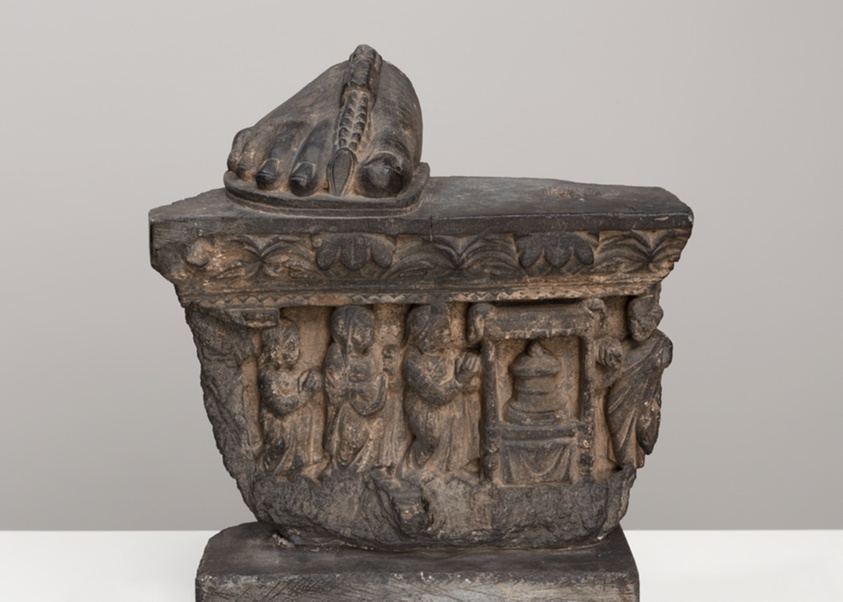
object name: Sculpture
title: Veneration of the Buddha's Relics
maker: Pakistan or Afghanistan; Ancient region of Gandhara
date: Kushan period, 2nd/3rd century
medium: Schist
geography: Gandhara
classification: stone; asian art; sculpture